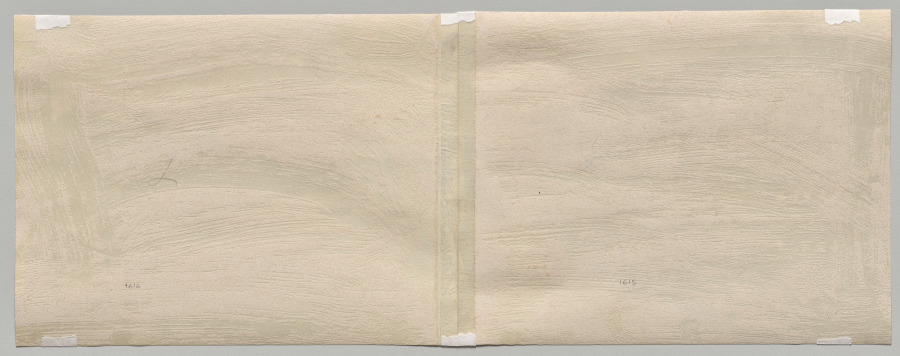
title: Two-Part Panorama with View of the Narmada River at Omkareshwar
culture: India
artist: Raja Deen Dayal (Indian, 1844–1905)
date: 1882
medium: albumen print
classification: Photograph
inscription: Inscription at center left edge of left-side print: "1615"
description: This stunning panorama boldly places the sacred Narmada River in the middle and foreground. Raja Deen Dayal forces the viewer’s eye to journey between the left-hand island with Omkareshwar Temple, an important pilgrimage site that is one of 12 revered Jyotirlinga shrines of Shiva, and Mamleshwar, a shrine to Shiva on the river’s south bank, which is on the mainland.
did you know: The temple on the left is believed to one of 12 places—Jyotirlinga shrines—where the Hindu god Shiva appeared as a bright column of light.